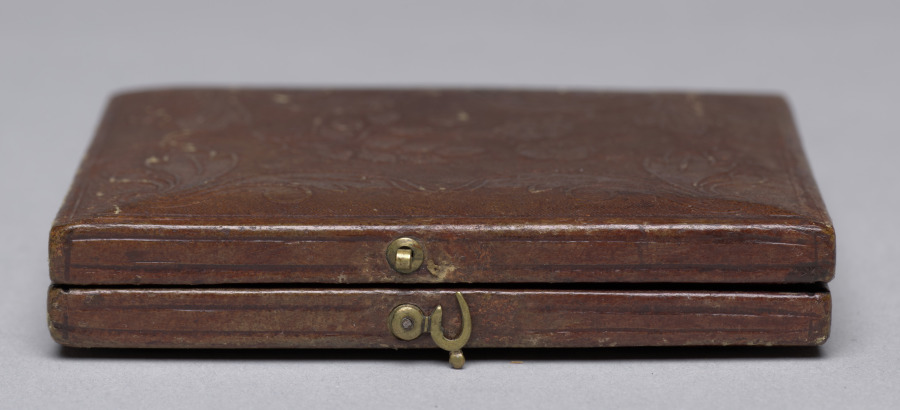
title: Architect with his drawings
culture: America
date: c. 1850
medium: daguerreotype, sixth plate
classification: Photograph